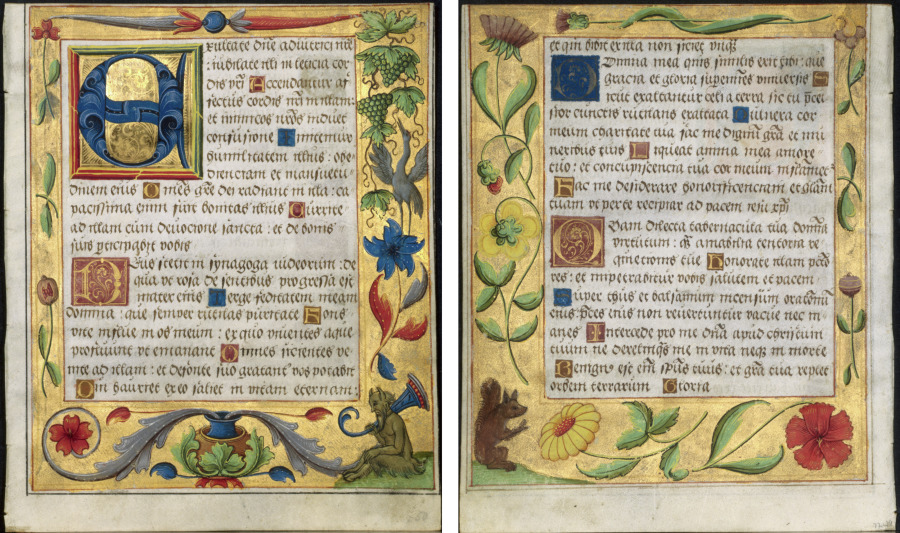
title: Leaf from a Psalter and Prayerbook: Initial E with Ornamental Border Containing a Seated Satyr and a Bird Eating Grapes (recto) and Ornamental Border with Flowers and Squirrel (verso) (2 of 3 Excised Leaves)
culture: North Germany, Hildesheim (?), 16th century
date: c. 1524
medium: ink, tempera and liquid gold on vellum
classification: Manuscript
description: This leaf reveals the charm of secular decoration such as satyrs or domestic activities like cooking. Such details would have been a sumptuous delight to the original owner. The original book was a highly personalized volume apparently written and illuminated in North Germany as suggested by internal textual references. The prominent inclusion of Saint Godehard (died 1038), Bishop of Hildesheim, in the calendar (not visible) would suggest that the manuscript was produced in that city.